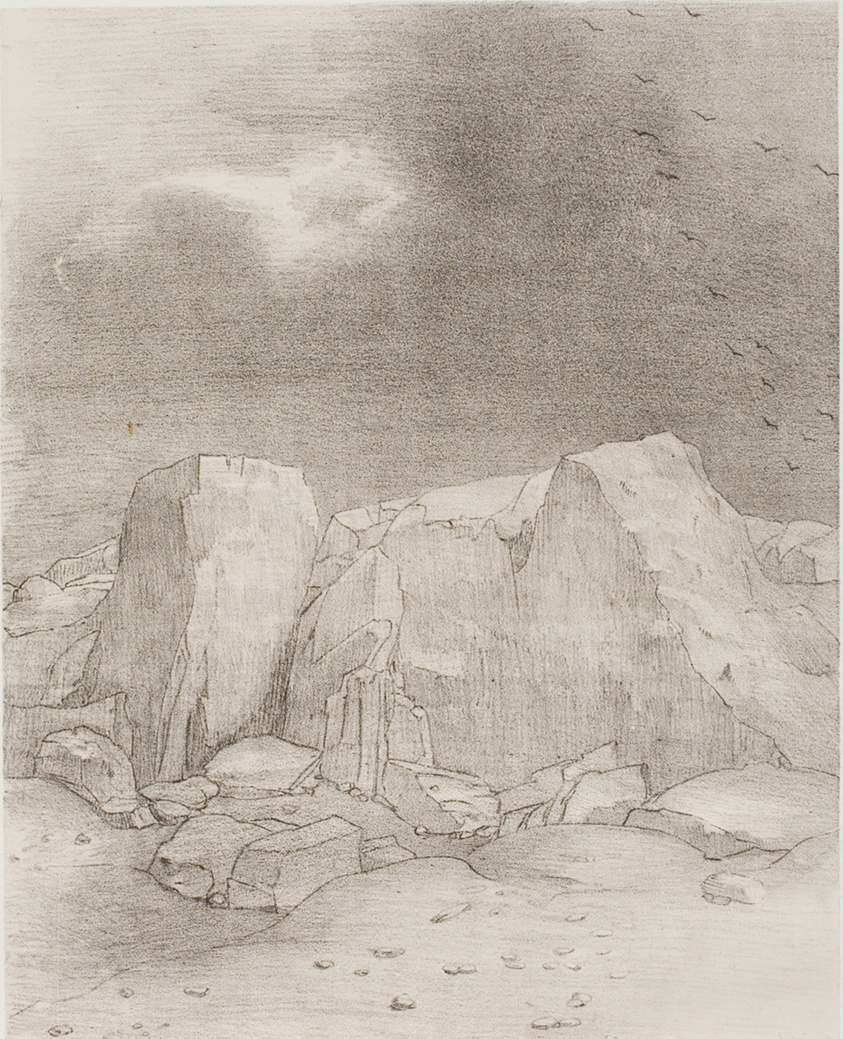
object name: Print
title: And He Discerns an Arid, Knoll-Covered Plain, plate 7 of 24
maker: Odilon Redon (French, 1840-1916)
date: 1896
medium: Lithograph in black on light gray China paper laid down on ivory wove paper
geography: France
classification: lithograph; print; prints and drawing; paper